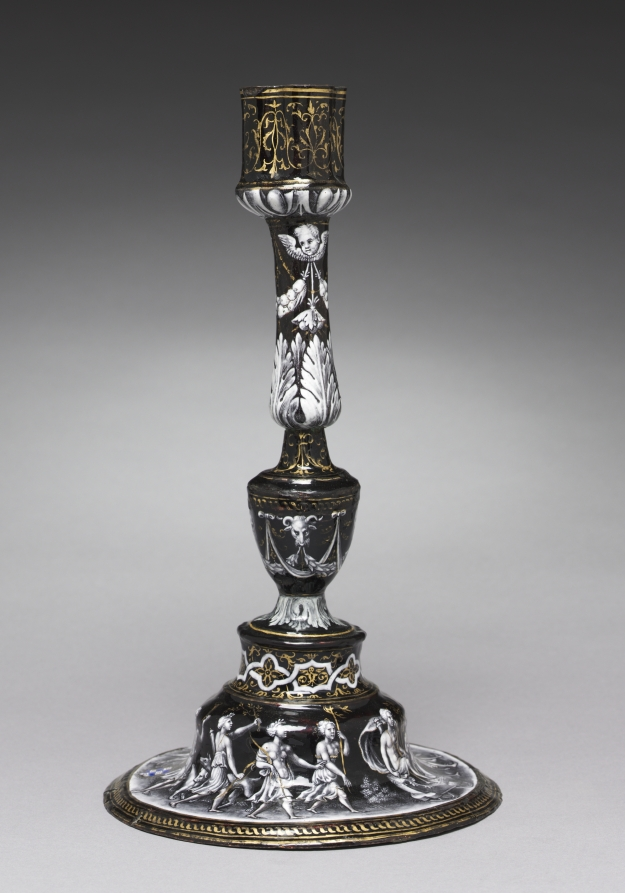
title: Candlestick Depicting the Triumph of Diana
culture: France, Limoges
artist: attributed to Jean II de Court (French, before 1583)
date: c. 1565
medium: painted enamel (grisaille) on copper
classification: Enamel